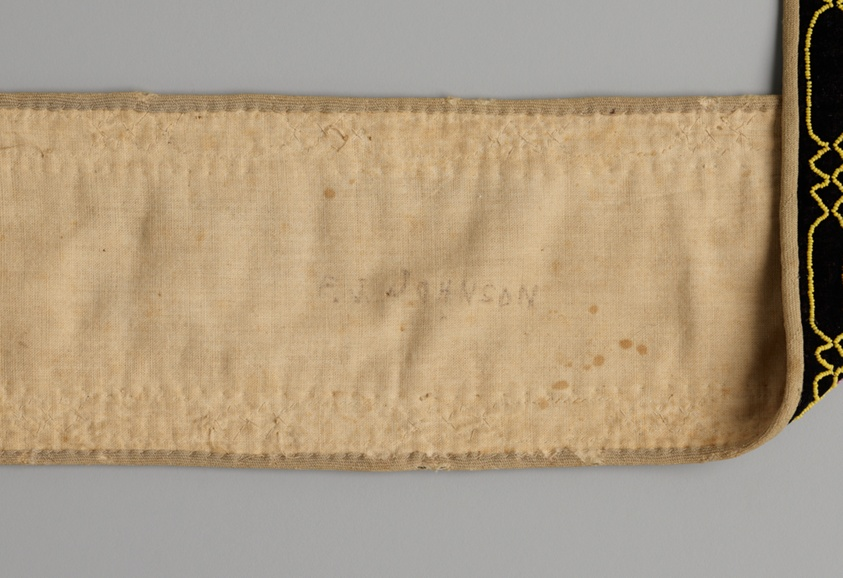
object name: Costume and Accessories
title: Man's Shoulder Bag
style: potawatomi, native american, americas, Arts of the Americas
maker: Maker unknown (Potawatomi); Great Lakes region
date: Mid–late 19th century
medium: Cotton, velvet, yarn, and glass seed beads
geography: Great Lakes Region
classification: beadwork; costume accessory; costume; art of the americas